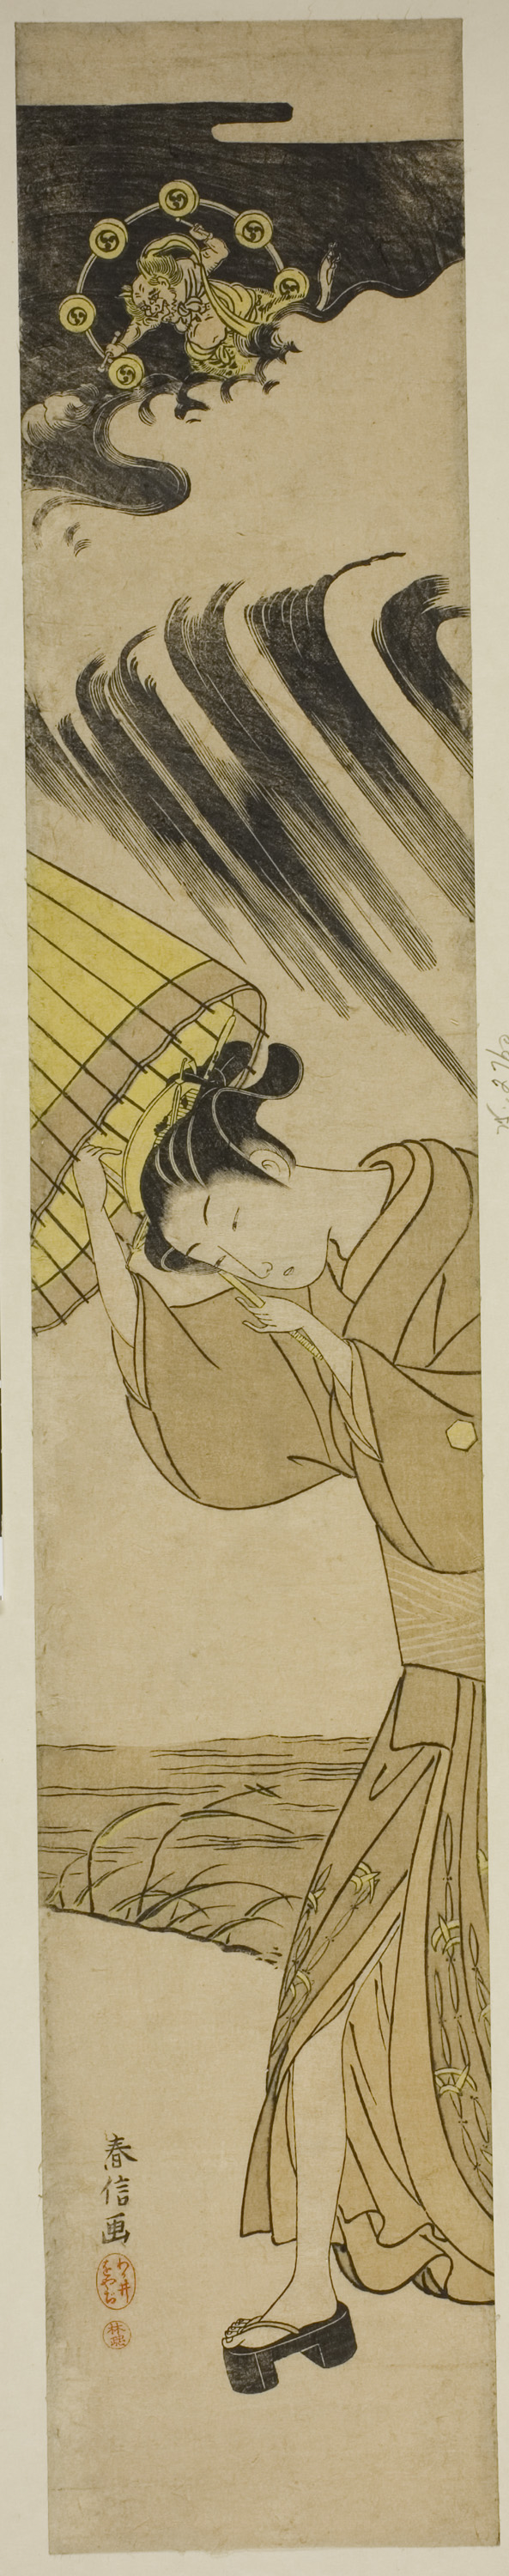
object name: Print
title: Woman Opening Umbrella as Thunder Approaches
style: Japanese (culture or style)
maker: Suzuki Harunobu 鈴木 春信; Japanese, 1725 (?)-1770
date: c. 1769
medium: Color woodblock print; hashira-e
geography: Japan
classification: woodblock print; print; asian art